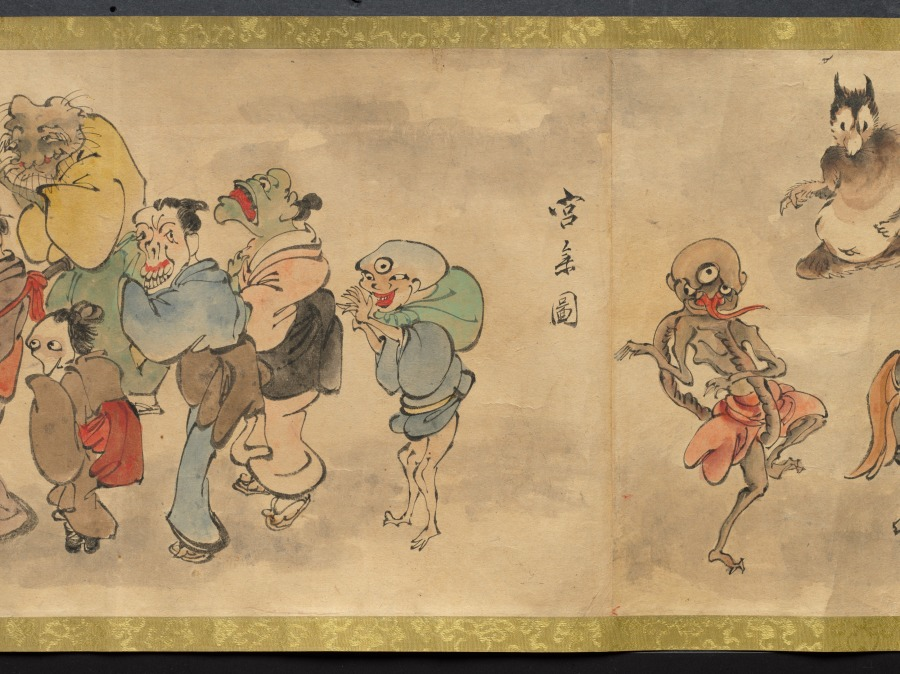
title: An Illustrated Marriage of Apparitions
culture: Japan, Edo period (1615–1868)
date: mid-1800s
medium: handscroll; ink and color on paper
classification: Painting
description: The matchmaking, engagement, wedding, and birth of the first child of two apparitions, or bakemono, literally "things that change," are illustrated in this whimsical, humorous handscroll. Japanese folklore abounds with such strange creatures, most famously represented in handscrolls featuring a procession of 100 supernatural monsters. Aside from a textual preface and cartouches indicating the content of the scenes, the tale is told visually. The artist and whereabouts of the original handscroll are unknown, but a number of other 19th-century copies by amateur painters exist in Japanese collections, attesting to its broad appeal.